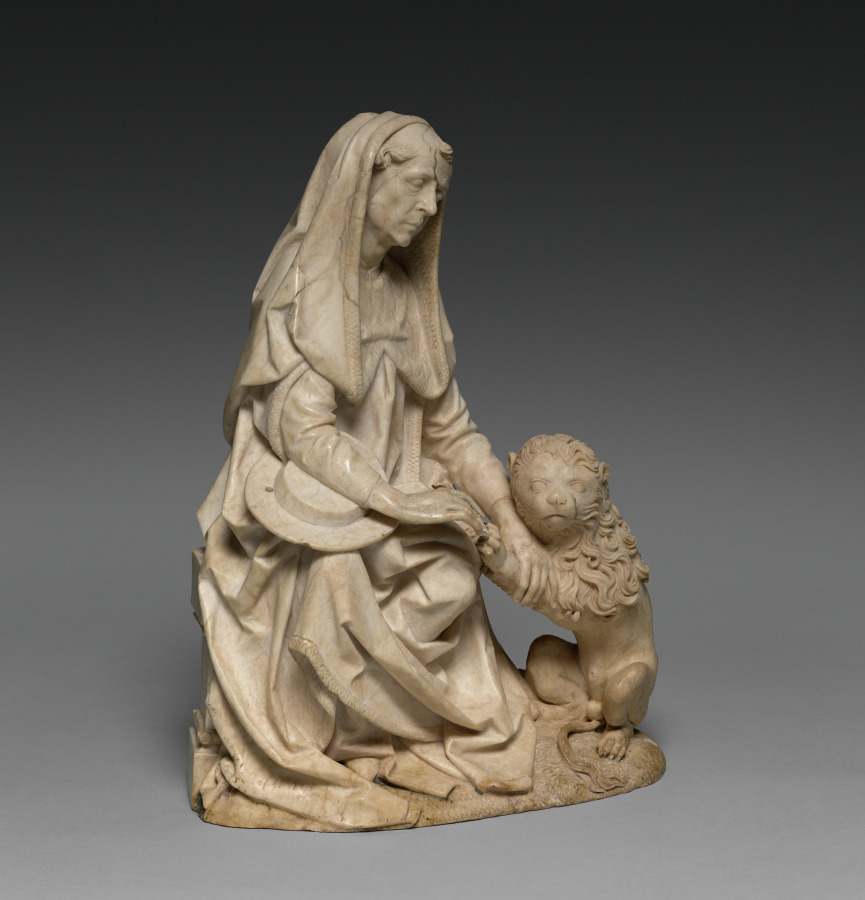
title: Saint Jerome and the Lion (From the former Church of St. Peter in Erfurt)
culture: Germany, Würzburg, late 15th Century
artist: Tilman Riemenschneider (German, active Würzburg, c. 1460–1531)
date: c. 1495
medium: alabaster, traces of polychromy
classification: Sculpture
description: According to legend, Saint Jerome (347–420 bce) lived in the desert, where he removed a thorn from an injured lion. Jerome is venerated in the Catholic Church as a Church Father, an important early author of Christianity. Here, he wears cardinal’s clothing from around 1500. Tilman Riemenschneider focused on Jerome’s relationship with the lion, creating empathy for the wounded animal. The delicacy of the depiction, which may have been partially painted to add highlights, is typical of alabaster, as is its fine polishing. The cord of the cardinal’s hat, missing today, may have been supplemented from another material.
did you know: In the story Saint Jerome encounters a fearsome lion, here depicted as diminutive, gentle, and submissive.